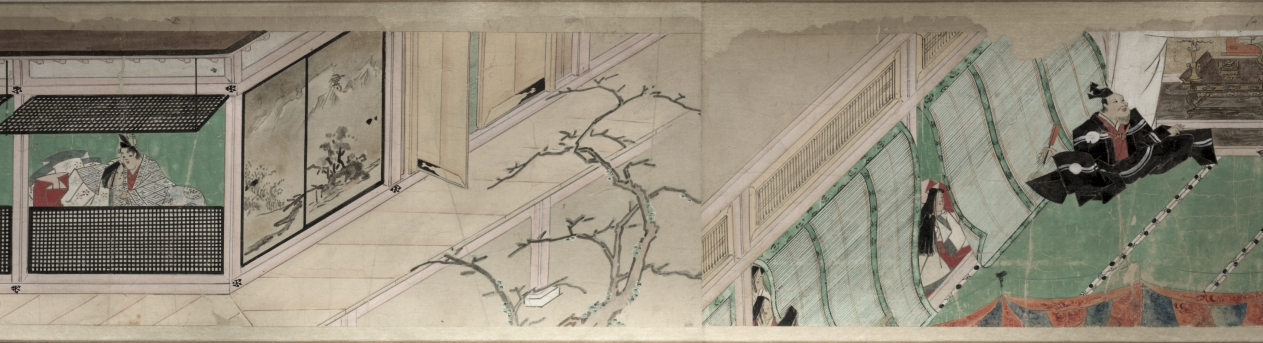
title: The Saltmaker's Story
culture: Japan, Edo period (1615–1868)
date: early 1600s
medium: One of a pair of handscrolls; ink, color, and gold on paper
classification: Painting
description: Once read and copied by girls at New Year’s celebrations and included in dowries, The Saltmaker’s Story is a rags-to-riches tale in which daughters are gifts from the gods. Despite his simple outlook, the main character progresses from humble roots as an associate at Kashima Shrine to the elite status of grandfather of the emperor through the intervention of the Kashima deity. The Saltmaker’s Story is traditionally presented in a set of three scrolls, but the text of this set has been removed by a previous owner, who remounted the illustrations as a pair. The paintings of this one take us from right to left through the second half of the tale.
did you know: This handscroll originally had texts before its paintings, but the texts were removed.